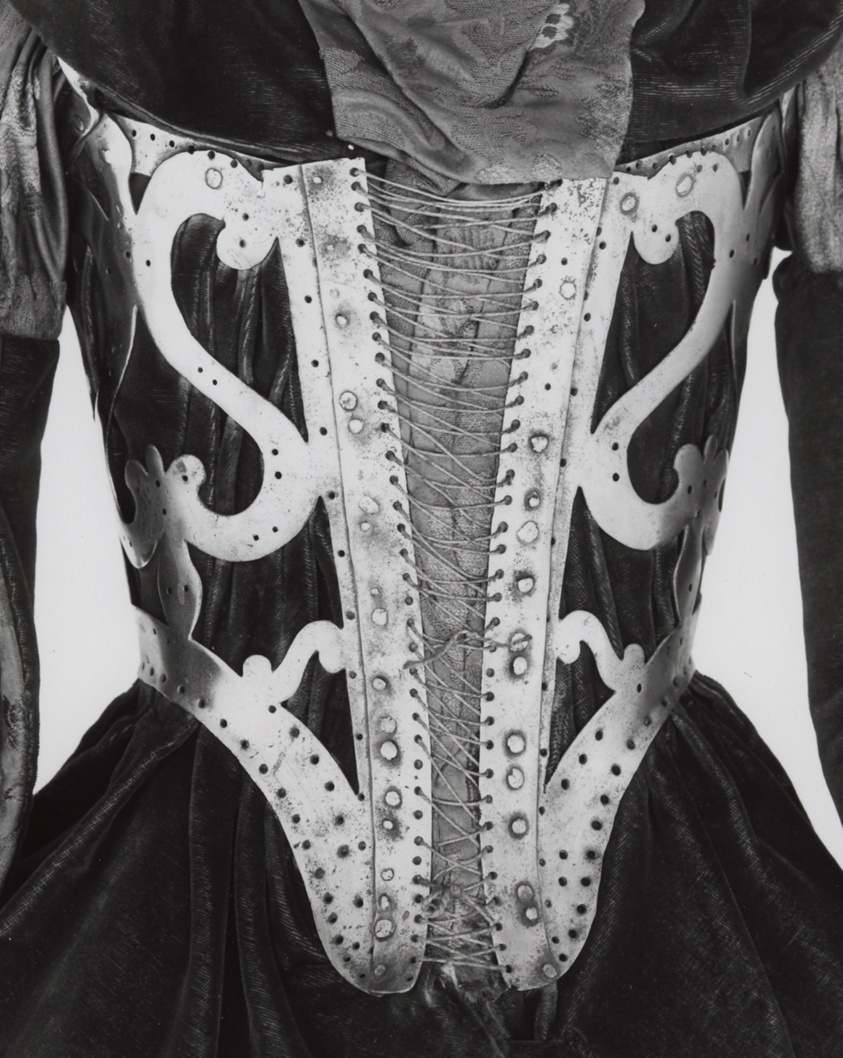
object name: Armor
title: Corsette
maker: French or Italian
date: c. 1600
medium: Steel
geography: France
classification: suit-element; armor; arms and armor